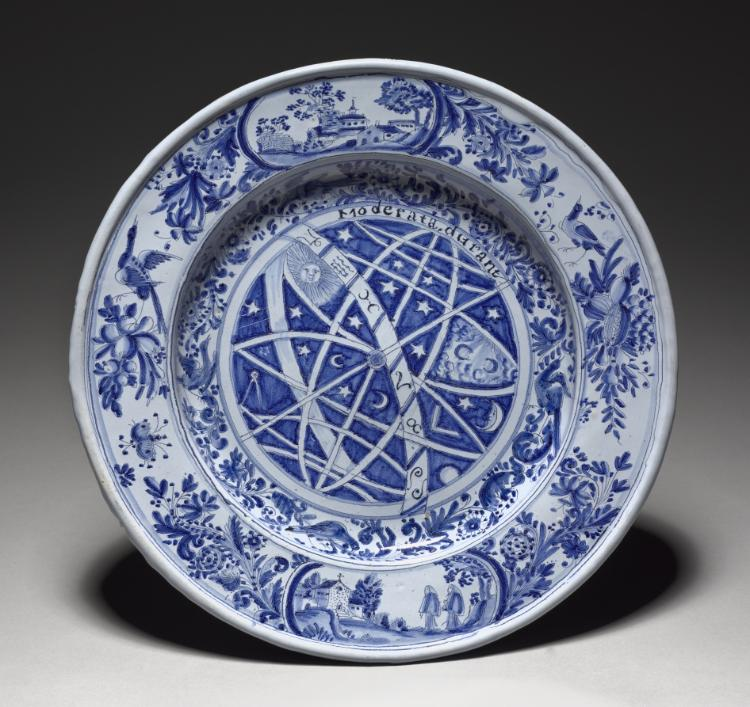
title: Large Plate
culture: France, late 17th Century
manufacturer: Nevers Factory (French)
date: late 1600s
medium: faience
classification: Ceramic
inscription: on front, inscribed: Moderata. durant.